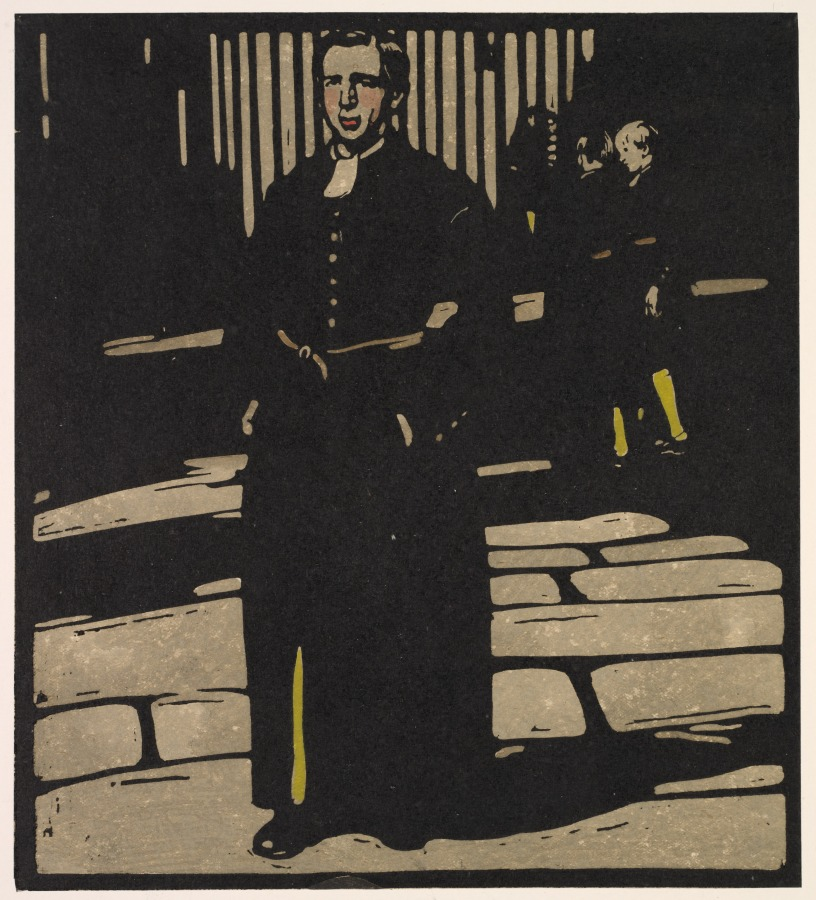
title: London Types: Bluecoat Boy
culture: England, 19th century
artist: William Nicholson (British, 1872–1949)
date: 1898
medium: woodcut hand-colored with watercolor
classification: Print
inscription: lower left margin, in black ink: William Nicholson - 1898 -